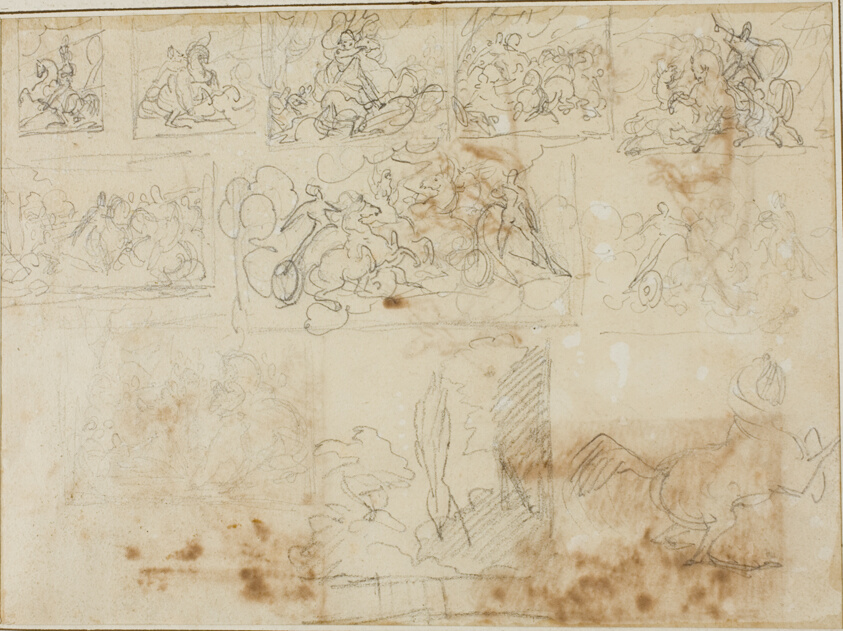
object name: Drawing and Watercolor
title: Eleven Compositional Sketches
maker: Jean Louis André Théodore Géricault (French, 1791-1824)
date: 1813/14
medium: Graphite, on tan wove paper, perimeter mounted on ivory laid paper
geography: France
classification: graphite; drawings (visual works); prints and drawing